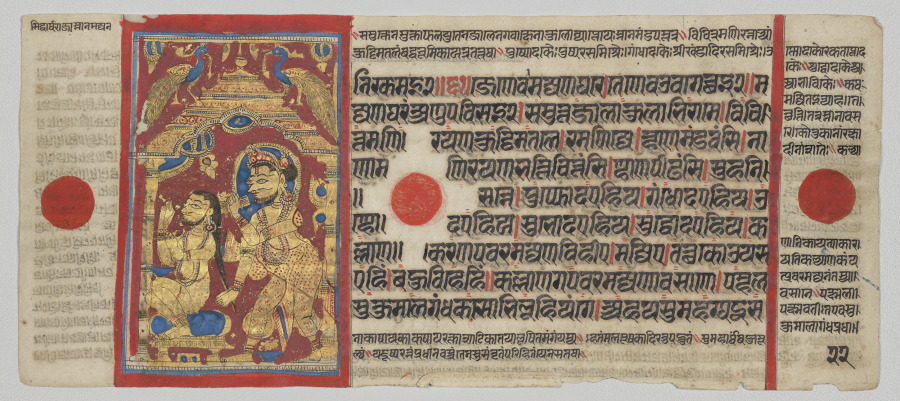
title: King Siddhartha's Morning Bath, Folio 22 (verso), from a Kalpa-sutra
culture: Western India, Gujarat, last quarter of the 15th century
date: c. 1475–1500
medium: Gum tempera, ink, and gold on paper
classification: Painting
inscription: [[upper left]] siddhārtharājā snānamajjan